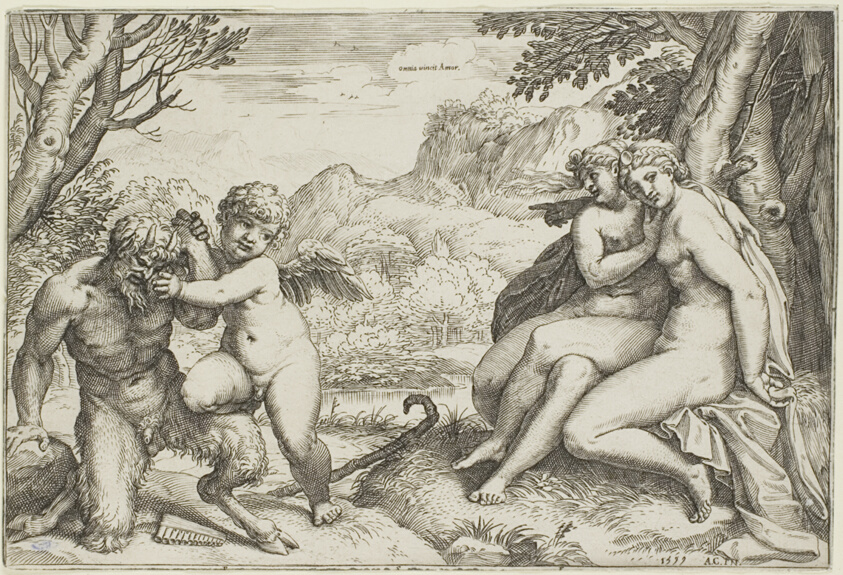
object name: Print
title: Love Conquers All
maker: Agostino Carracci (Italian, 1557-1602)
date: 1599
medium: Etching on ivory laid paper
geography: Italy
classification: print; prints and drawing